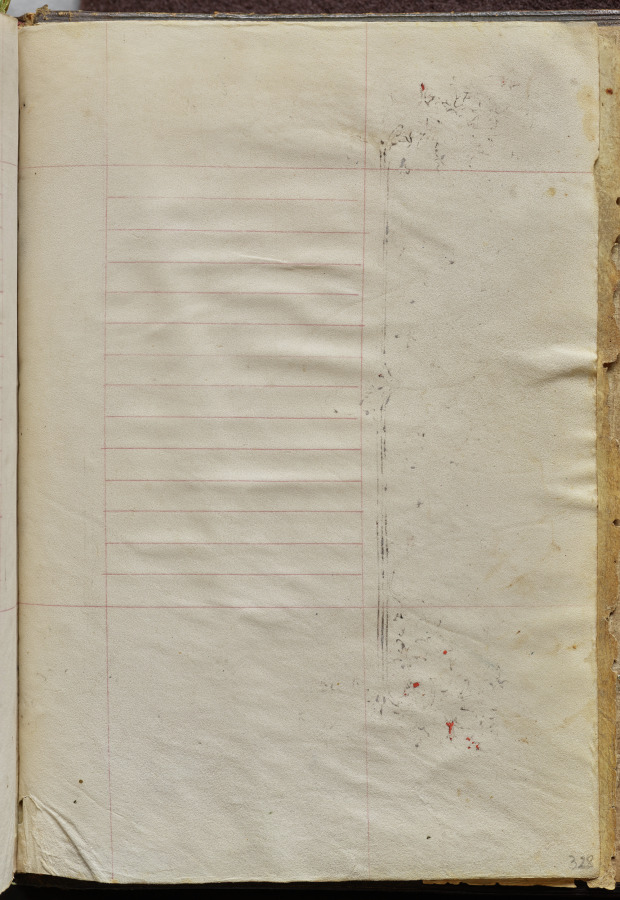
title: Hours of Charles the Noble, King of Navarre (1361-1425), fol. 328r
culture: France, Paris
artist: Master of the Brussels Initials and Associates (French)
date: c. 1405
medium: ink, tempera, and gold on vellum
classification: Bound Volume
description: This precious volume was obviously highly prized by its owner, the French-born King of Navarre, who had his coat of arms painted on no less than twenty folios. Rather than directly commissioning this manuscript from a specific workshop, it seems that Charles the Noble acquired his book of hours -- perhaps ready-made for the luxury market -- while on a trip to Paris in 1404-05. A collaborative effort, six painting styles are evidenced within the pages of this codex, those of two Italians, two Frenchmen, and two Netherlanders. The painter who was responsible for the planning and decoration of the book, and who produced seventeen of the large miniatures, was a Bolognese artist known as the Master of the Brussels Initials. His principal assistant, responsible for most of the borders, was a Florentine who signed his name "Zecho" da Firenze on folio 208 verso.